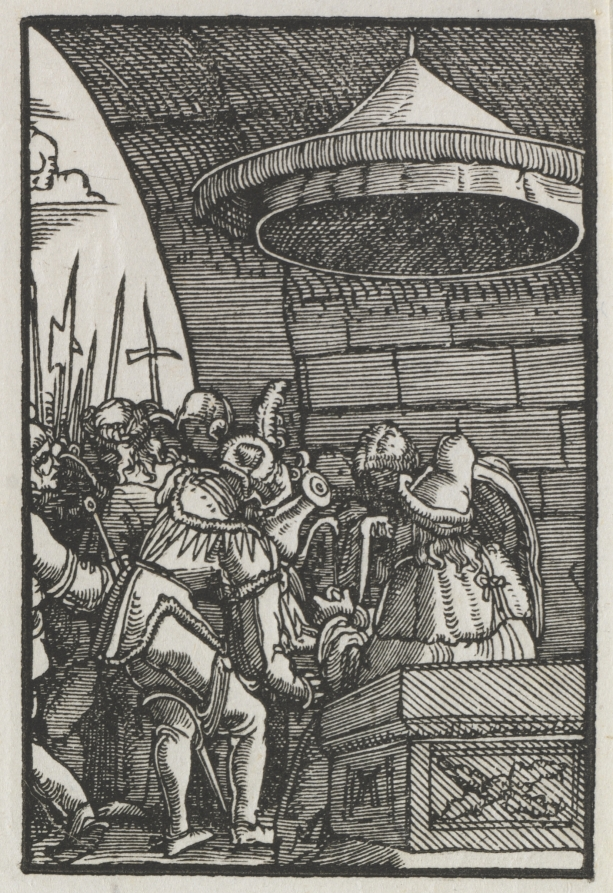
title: The Fall and Redemption of Man: Pilate Washing his Hands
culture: Germany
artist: Albrecht Altdorfer (German, c. 1480–1538)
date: c. 1515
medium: woodcut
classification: Print